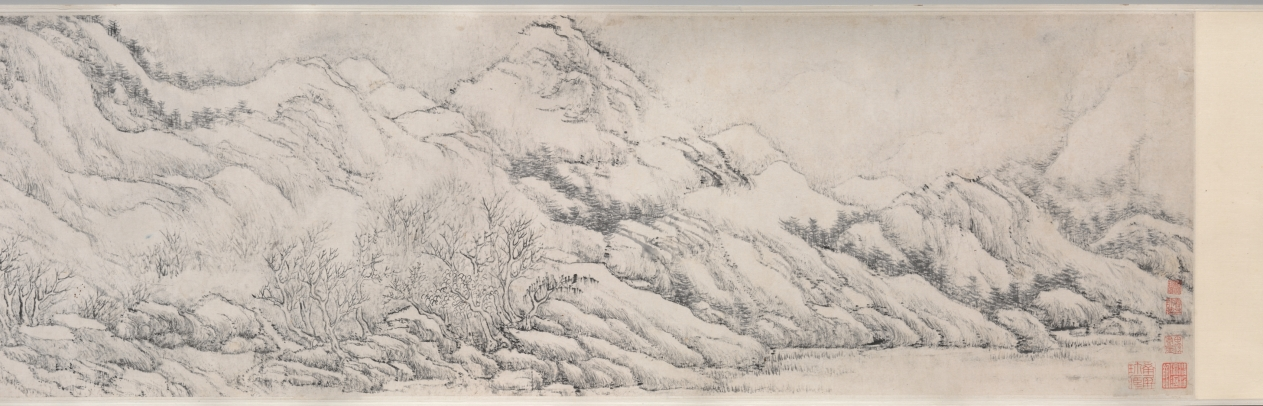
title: Snow Coloring the World White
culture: China, Qing dynasty (1644-1911)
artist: Fa Ruozhen (Chinese, 1613–1696)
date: 1690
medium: handscroll, ink on paper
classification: Painting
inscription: Artist's title on frontispiece, colophon with 6 poems, and 7 seals: [seal] Ch'ien-k'un i ts'ao t'ing. Snow Coloring the World White. Huang-shan lao-jen, Jo-chen, at the age of seventy eight. [2 seals] Fa yin Jo-chen; Huang-shih shih. (Artist's poems are not translated.) In the first month of the keng-wu year [1690], 1 was seventy-eight years old. On a snowy day I was pleased to have my good son-in-law Ch'eng-ssu and other gentlemen visiting me at my Tz'u-ching Hall at Yellow Hill. I did this snowscape to record the event. [2 seals] Fa Jo-chen; Tun Chai. [2 seals at end of painting] Fa yin Jo-chen; Huang-shih shih. trans. LYSL/WKH 12 additional seals: 8 of Ho Kuan-wu (20th c.); 1 of Wang Nan-p'ing (20th c.); 3 unidentified.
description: Fa Ruozhen was a scholar-official and prolific poet who focused on painting as his government career declined. The inscription records that he was 78 years old when he painted this handscroll to welcome visitors on a snowy day. At this point in his artistic development, Fa created expressive landscapes and experimented with unconventional brushwork. This handscroll begins at the right with gentle hills dotted with evergreens and bare deciduous trees. By the end, the twisting rocky forms dominate. Fa’s official career spanned the fall of the Han Chinese Ming dynasty (1368–1644) and the rise of the Manchurian Qing dynasty (1644–1911). While other scholar-officials who declined to serve the Manchus had their reputations enhanced, critics accused Fa of disloyalty for serving in the new bureaucracy. Fa was deeply sensitive about this criticism. In many of his 4,000 known poems, he responded by emphasizing the Confucian virtue of being a good administrator particularly during an unstable time. Fa’s “disorderly” brushwork and distressed landscapes seem to reflect the political upheaval of his era.